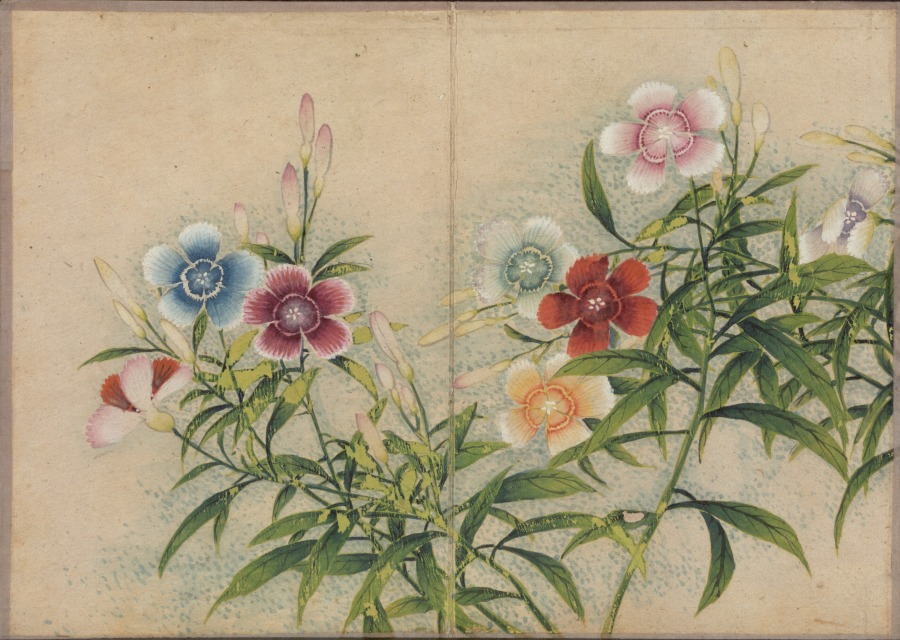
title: Desk Album: Flower and Bird Paintings (Pinks)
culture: China, Qing dynasty (1644-1911)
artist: Zhang Ruoai (Chinese, 1713–1746)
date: 1700s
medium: album leaf, ink and color on paper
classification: Painting